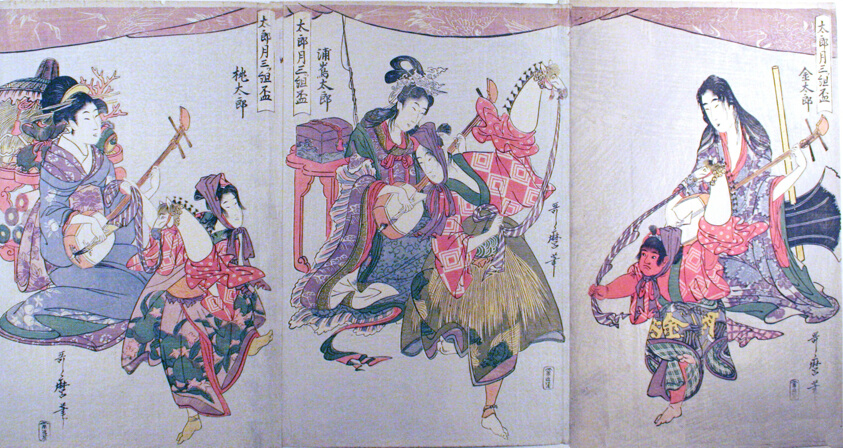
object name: Print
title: Kintaro, Urashimataro, and Momotaro, from the triptych "Set of Three Sake Cups for the First Month (Tarozuki mitsugumi sakazuki)"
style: Japanese (culture or style)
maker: Kitagawa Utamaro 喜多川 歌麿; Japanese, 1753 (?)-1806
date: c. 1800/01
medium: Color woodblock print; oban triptych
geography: Japan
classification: woodblock print; print; asian art